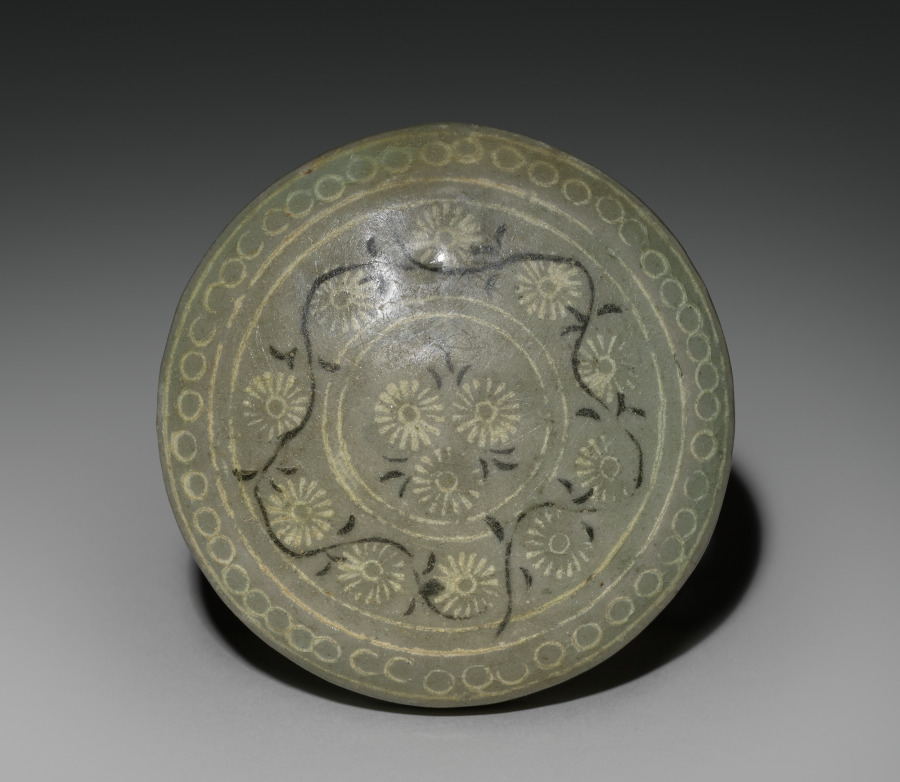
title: Pigment Box (lid)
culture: Korea, Goryeo dynasty (918–1392)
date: 1200s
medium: inlaid celadon ware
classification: Ceramic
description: Celadons, spoons, seals, and bronze mirrors were the most common burial objects in tombs during the Goryeo period (918–1392). Once used to contain colored powder, rouge, and eyebrow gel for makeup, this small container was one of the standard goods that furnished elites' tombs. Both women and men used the grain powder of rice or millet for whitening their skin, safflower extract for rouge, and plant ash or soot for eyebrow gel. Yet, natural-looking makeup seems to have been the most favorable one in Korea according to the travelogue by Xu Jing (1091–1153), the Chinese diplomat who visited Korea in 1123.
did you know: This ceramic container was used to store either incense or cosmetics.